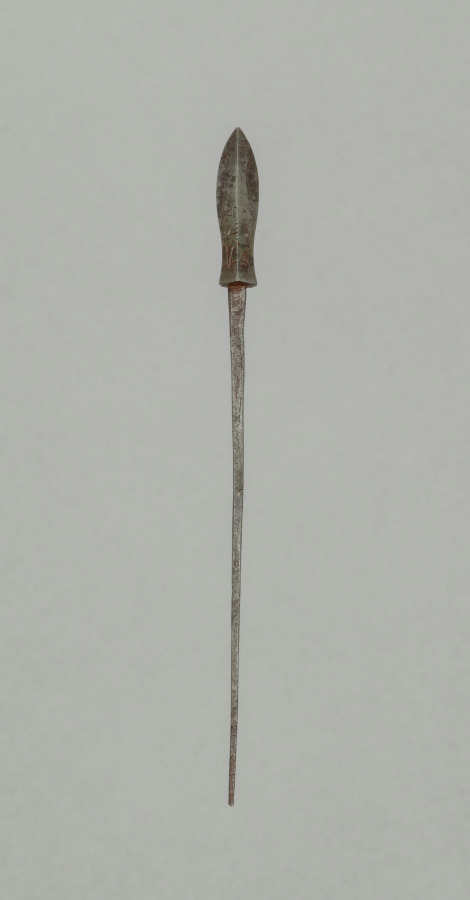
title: Arrow Point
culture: Japan, Edo period (1615–1868)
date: 1700s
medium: steel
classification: Arms and Armor